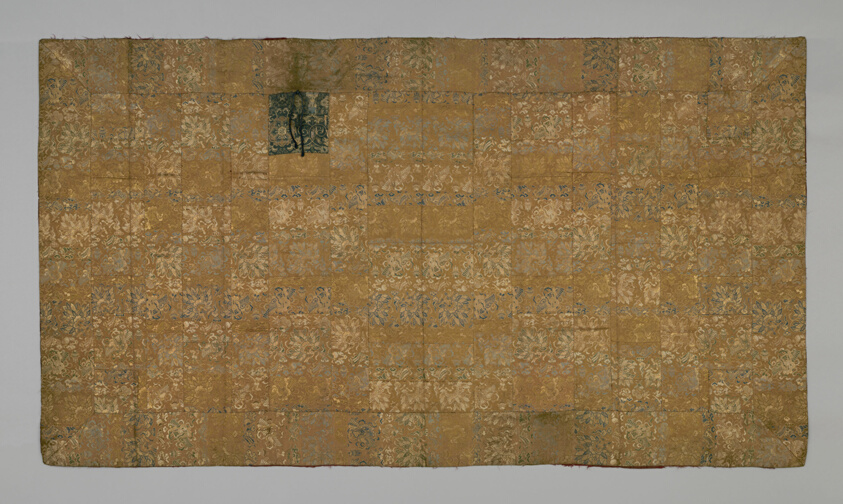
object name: Textile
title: Kesa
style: edo (japanese period)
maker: Japan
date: late Edo period (1789–1868), late 18th/early 19th century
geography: Japan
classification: textile; silk; costume; asian art; weaving; liturgical - buddhist